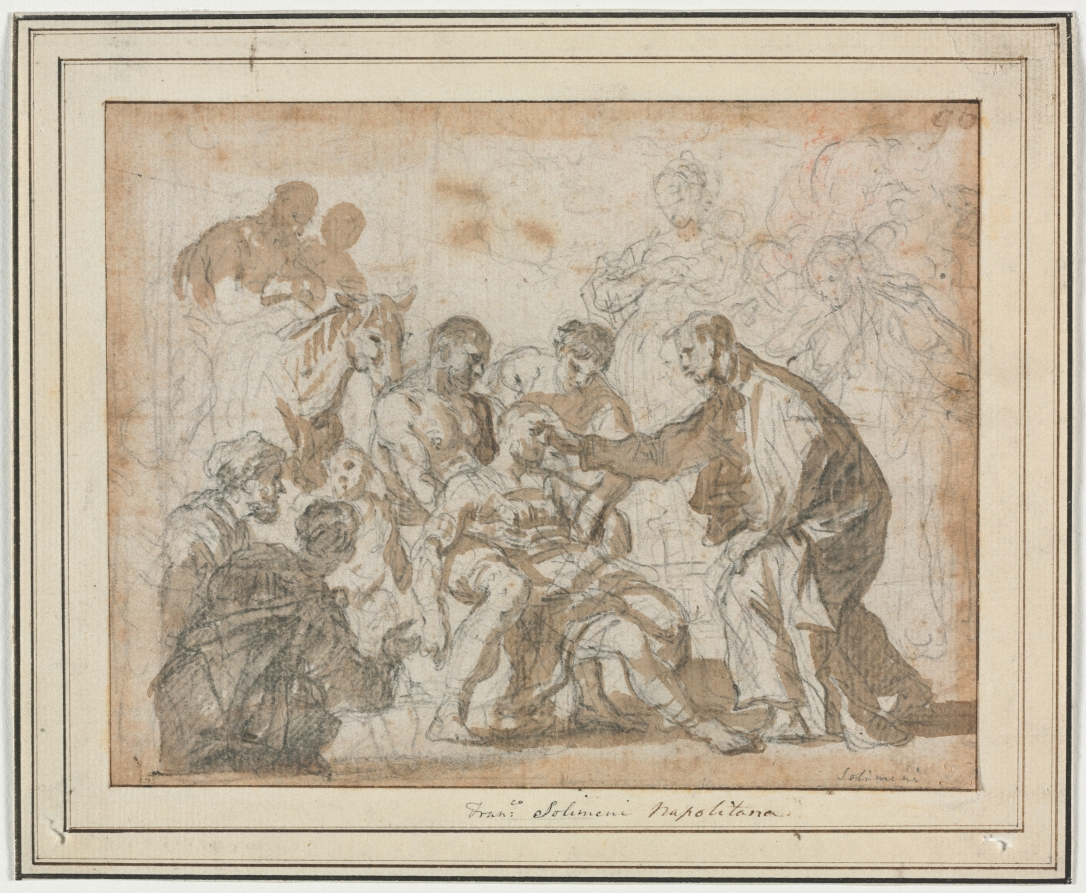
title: A Miracle of Saint Maurus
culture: Italy, 18th century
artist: Francesco Solimena (Italian, 1657–1747)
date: 1697–1708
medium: black chalk and brown wash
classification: Drawing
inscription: Lower right, in black chalk: "Solimeni" in black ink on the mount: "Fran.co Solimeni Napolitano"